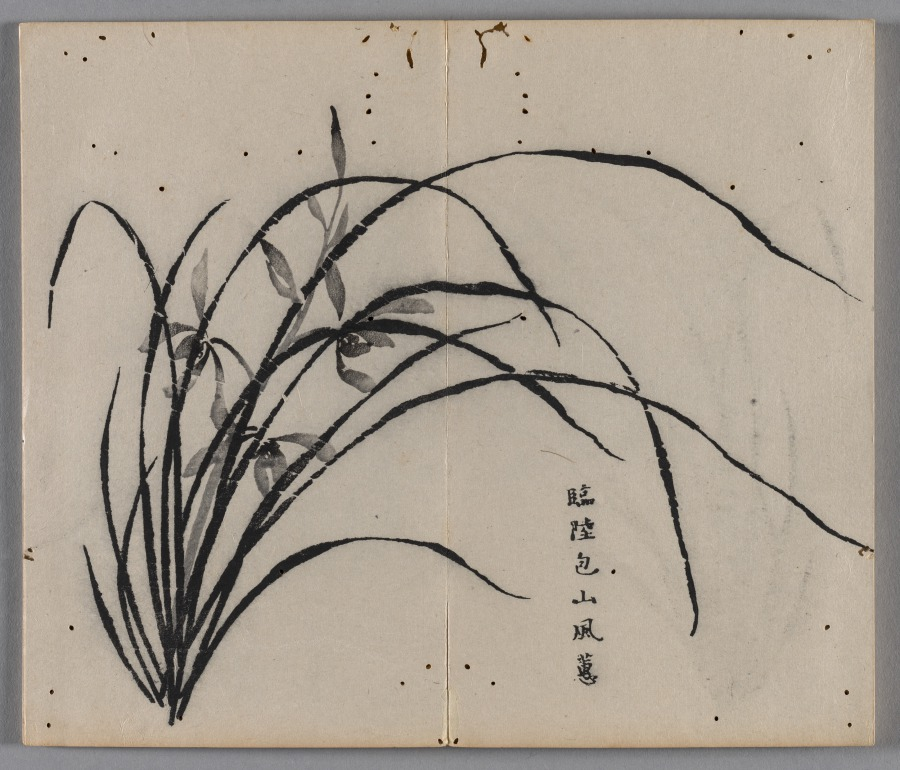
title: Ten Bamboo Studio Painting and Calligraphy Handbook (Shizhuzhai shuhua pu): Orchids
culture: China, Qing dynasty (1644-1911)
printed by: Hu Zhengyan (Chinese, c. 1584–1674)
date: 1633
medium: Woodblock-printed book; ink and colors on paper; first edition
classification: Print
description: Color printing reached a level of perfection in the early 1600s, as seen in this Ten Bamboo Studio Collection of Calligraphy and Painting and the Mustard Seed Garden Manual of Painting (printed 1679 and 1701). The painterly quality, precision in registering (aligning) the woodblocks, and harmonious colors made them the most successful color print editions in Chinese history. Both editions were printed and compiled in Nanjing, spread nationwide, and had a great impact on the arts in Japan and Korea.